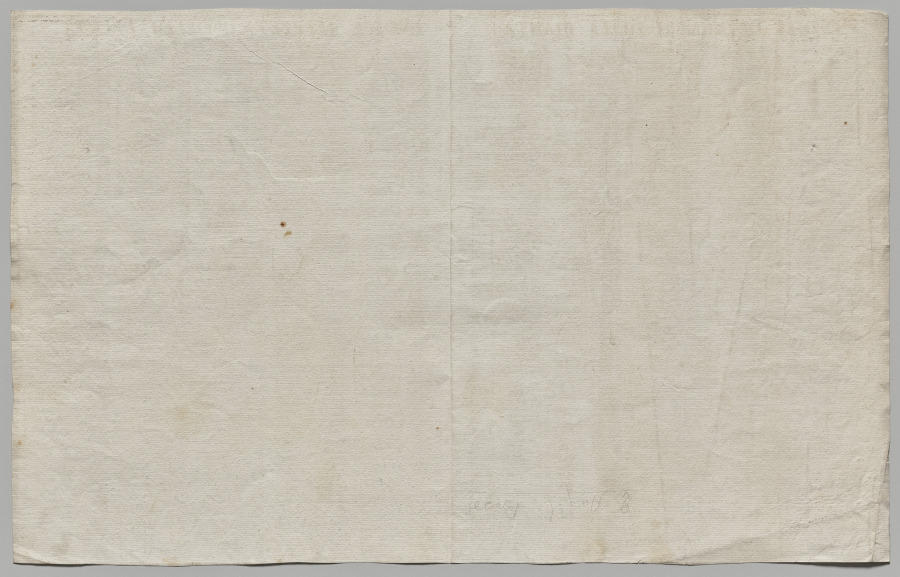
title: Nuova pianta di Roma data in luce da Giambattista Nolli l’anno MDCCXLVII, known as La Pianta Grande di Roma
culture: Italy, 18th century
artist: Giovanni Battista Nolli (Italian, 1701–1756)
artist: Carlo Nolli (Italian, 1690–1790)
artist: Rocco Pozzi (Italian, 1701–1774)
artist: Pietro Campana de Soriano (Italian, 1725–c. 1779)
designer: Stefano Pozzi (Italian, 1699–1768)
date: 1748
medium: etching and engraving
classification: Print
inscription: Written in pencil on verso: "2 August Bossi (?)"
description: The monumental Pianta Grande di Roma, or Large Plan of Rome, which measures about 5 x 7 feet when its twelve plates are assembled, is a landmark in both cartography and printmaking. The map is considered the first scientific rendering of Rome, establishing new standards of accuracy and thoroughness when it was published in 1748. Devised by the Lombard architect and surveyor Giovanni Battista Nolli (Italian, 1701-56), the creation of the map required over ten years of surveying the city carried out by Nolli and a team of assistants with the help of new measuring devices. In Nolli’s “ichnographic” (also called “ground”) plan, architectural features and the urban infrastructure are reduced to a single horizontal slice, a minutely detailed footprint that conveys dimensions, proportions, and orientations to scale with the utmost clarity.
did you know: To make this map, Pope Clement XII granted the mapmaker permission to measure courtyards and other interior, inaccessible spaces in monastic communities, even those in nuns’ convents, which was controversial at the time.